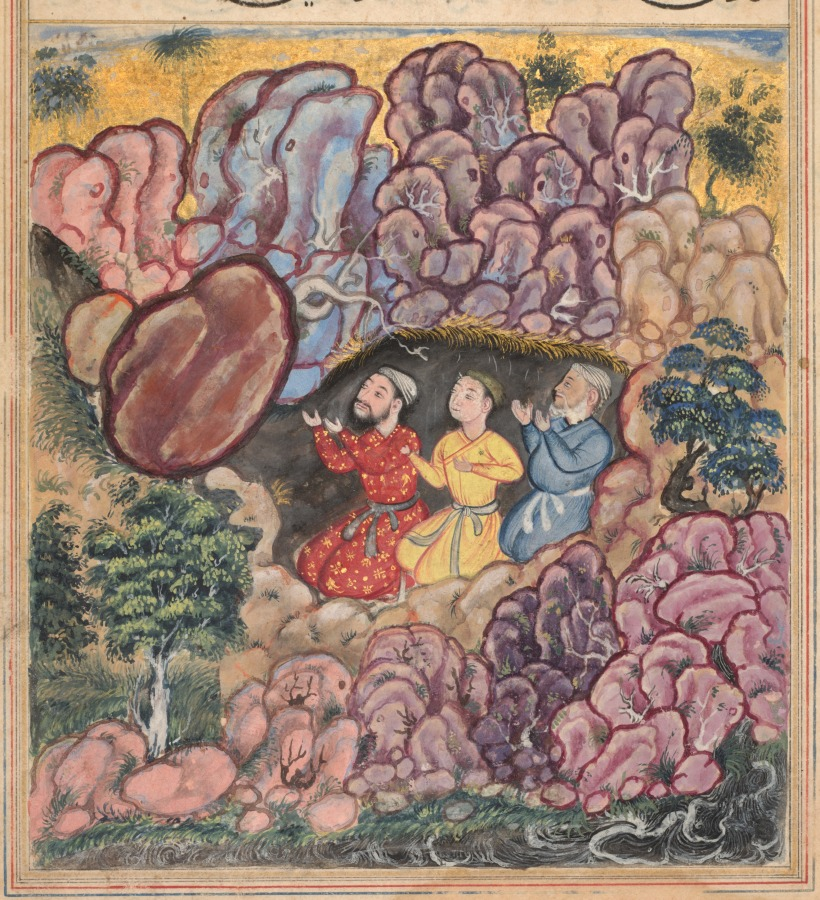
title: The tale of the three men trapped in a cave by a rolling boulder, from a Tuti-nama (Tales of a Parrot): Thirty-second Night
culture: Mughal India, court of Akbar (reigned 1556–1605)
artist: attributed to Bihzad (Persian, active in India mid-1500s)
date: c. 1560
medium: gum tempera, ink, and gold on paper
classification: Painting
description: Three men kneel in the bowels of a dark cave where they have been trapped while seeking hidden treasure. Fearful and desperate, they suddenly hear a disembodied voice that orders them to confess their transgressions. As each man speaks, a portion of the boulder disappears, and they are ultimately freed.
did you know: This painting is attributed to Bihzad, the son of Abd al-Samad the Persian master of the Mughal court.